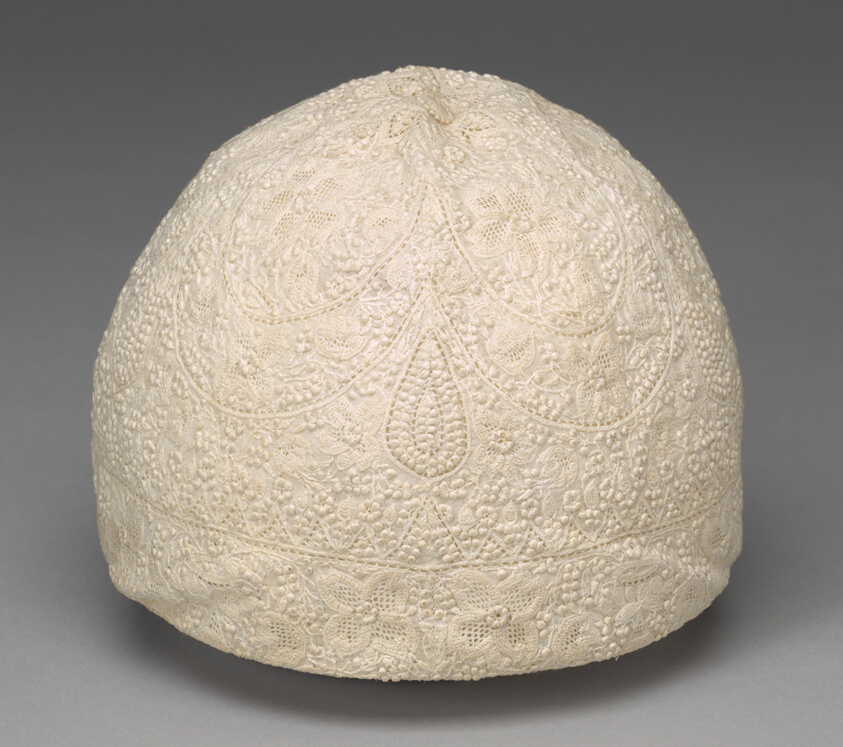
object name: Costume and Accessories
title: Cap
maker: France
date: 19th century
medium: Cotton, plain weave; embroidered with cotton threads in chain, back, stem, pulled and buttonhole stitches; French knots; hemstitched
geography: France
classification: textile; headdress - needlework; costume accessory - headdress; costume accessory; costume - needlework; costume; dress (garment); clothing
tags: fashion